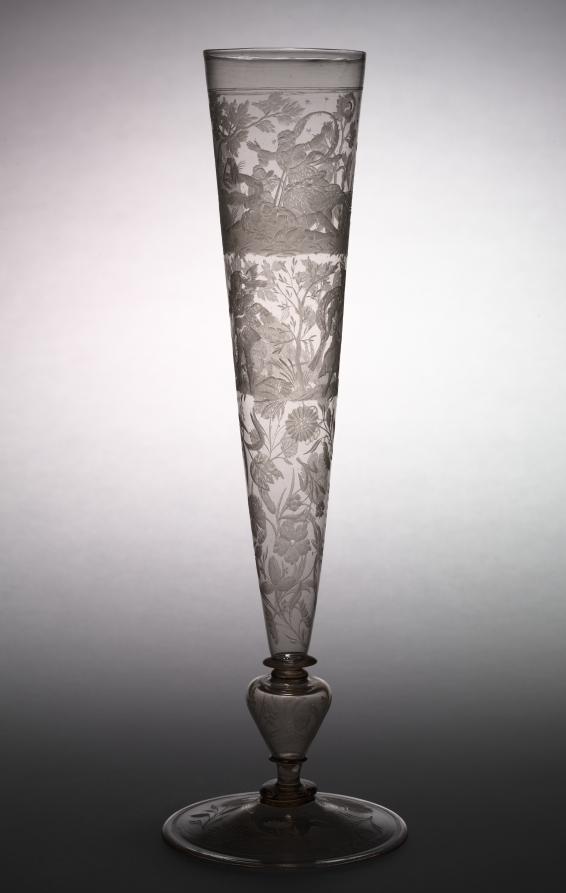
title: Flute Glass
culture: Germany, Thuringia, early 17th century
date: early 1600s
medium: glass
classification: Glass